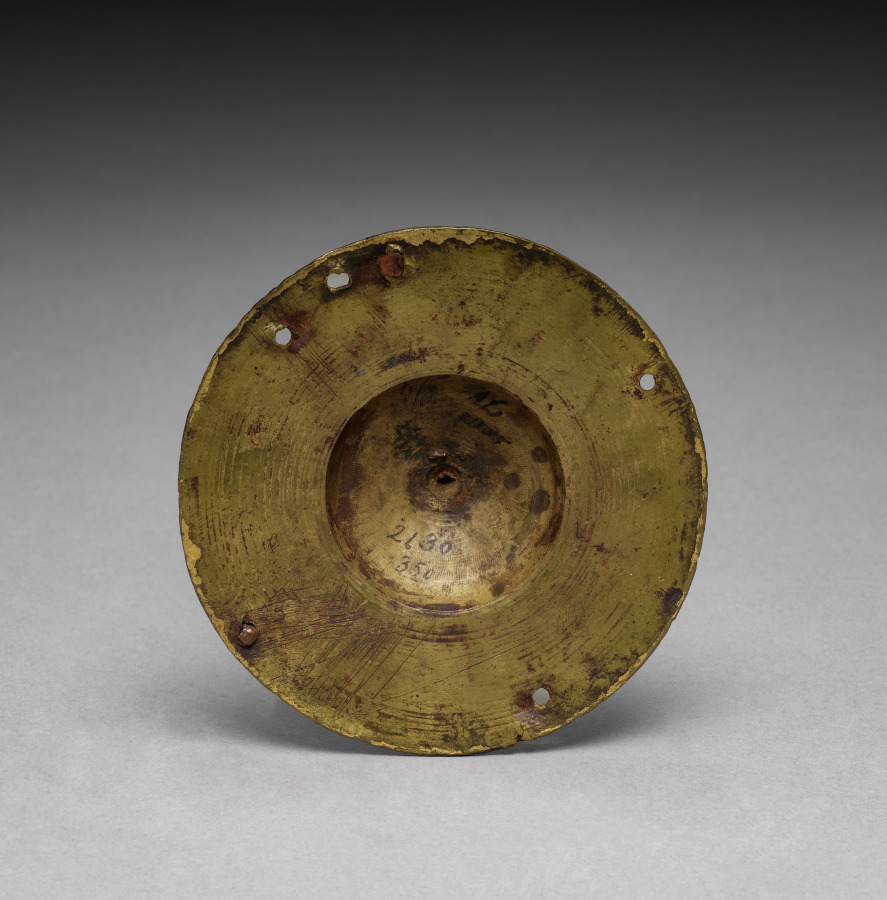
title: Shield Boss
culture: Italy, Renaissance Style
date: 1800s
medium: brass, gilded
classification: Arms and Armor